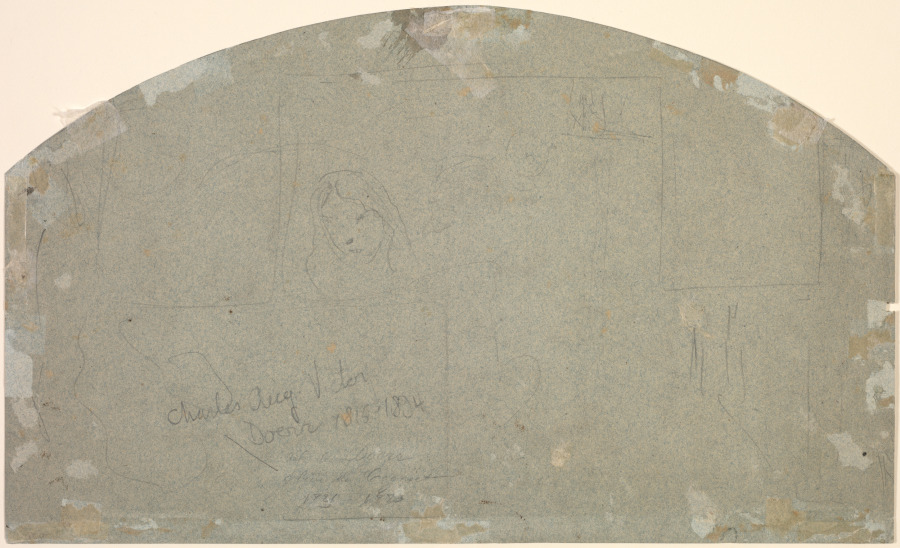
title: Street Scene (recto); Sketches (verso)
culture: France, 19th century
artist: Gustave Doré (French, 1832–1883)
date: c. 1848–49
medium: pen and brown ink and gray wash with white (recto); graphite (verso)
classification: Drawing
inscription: Signed in black ink, lower left: G. Dore; verso, slight graphic sketch of a woman's head; verso, inscribed in graphite, lower center: Charles Aug. Victor/Doerr 1815-1894/In another hand, in graphite: Ch. V. Doerr/eleve de Cogniet/1821-1880